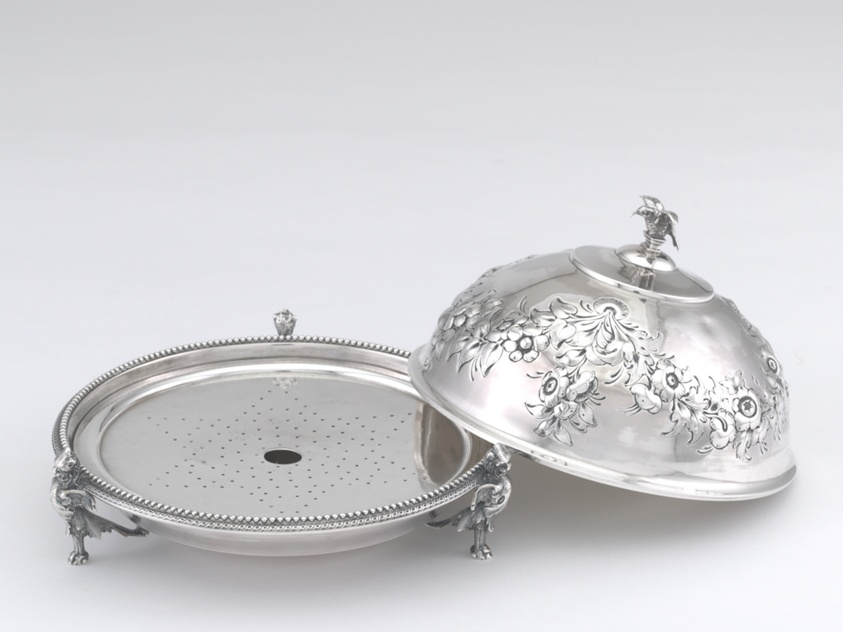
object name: Metalwork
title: Butter Dish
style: 19th century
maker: Gorham Manufacturing Company (American, founded 1831); Providence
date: 1853–65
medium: Silver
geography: Providence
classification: vessel for serving food; dish (vessel); silver; american decorative arts; american arts; decorative arts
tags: butter dish, birds, flowers, eagles, dining, eating